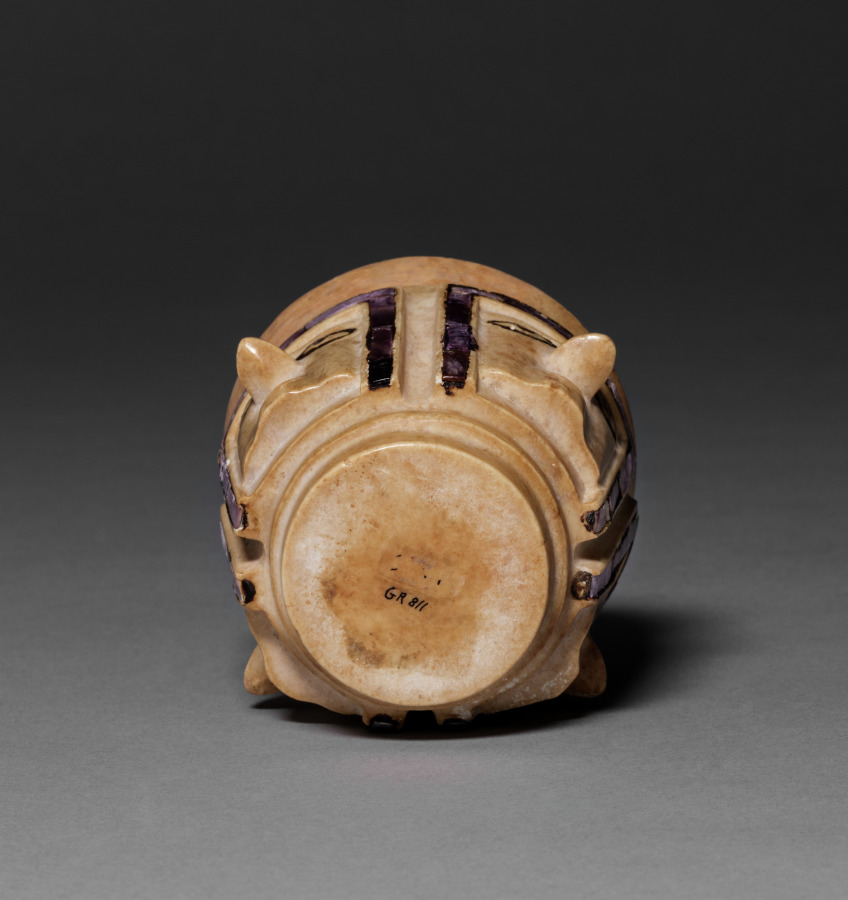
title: Cup with Four Faces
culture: Central Andes, Wari people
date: 600–1000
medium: Stone with shell inlay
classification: Stone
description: The identity of the four, wide-eyed faces on this cup is unknown. Equally mysterious is the cup’s function. It seems too small to be used for drinking beer at the feasts the Wari sponsored to put others in their debt. The size may suggest the cup was used in more intimate circumstances, perhaps to make libations to sacred forces that animated the ancient landscape.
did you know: The inlay is made of spondylus (thorny oyster) shell, a form of wealth in antiquity.